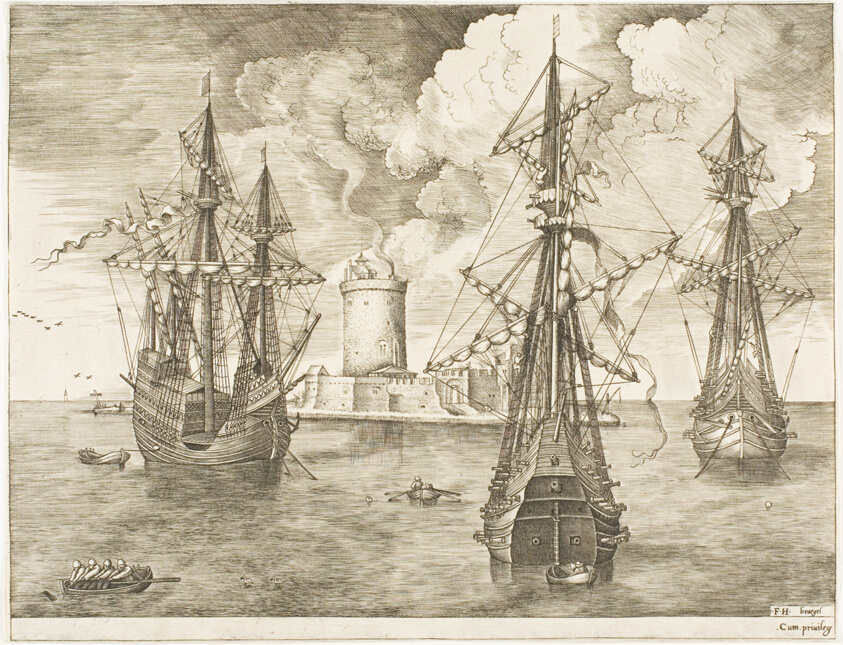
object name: Print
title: Four-Master and Two Three-Masters Anchored near a Fortified Island with a Lighthouse, from The Sailing Vessels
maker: Frans Huys (Flemish, c. 1522-1562); after Pieter Bruegel, the elder (Flemish, 1525/30-1569); published by Hieronymus Cock (Flemish, c. 1510–1570)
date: c. 1560–62, published 1665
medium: Engraving in black on ivory laid paper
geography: Flanders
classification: etching; print; prints and drawing